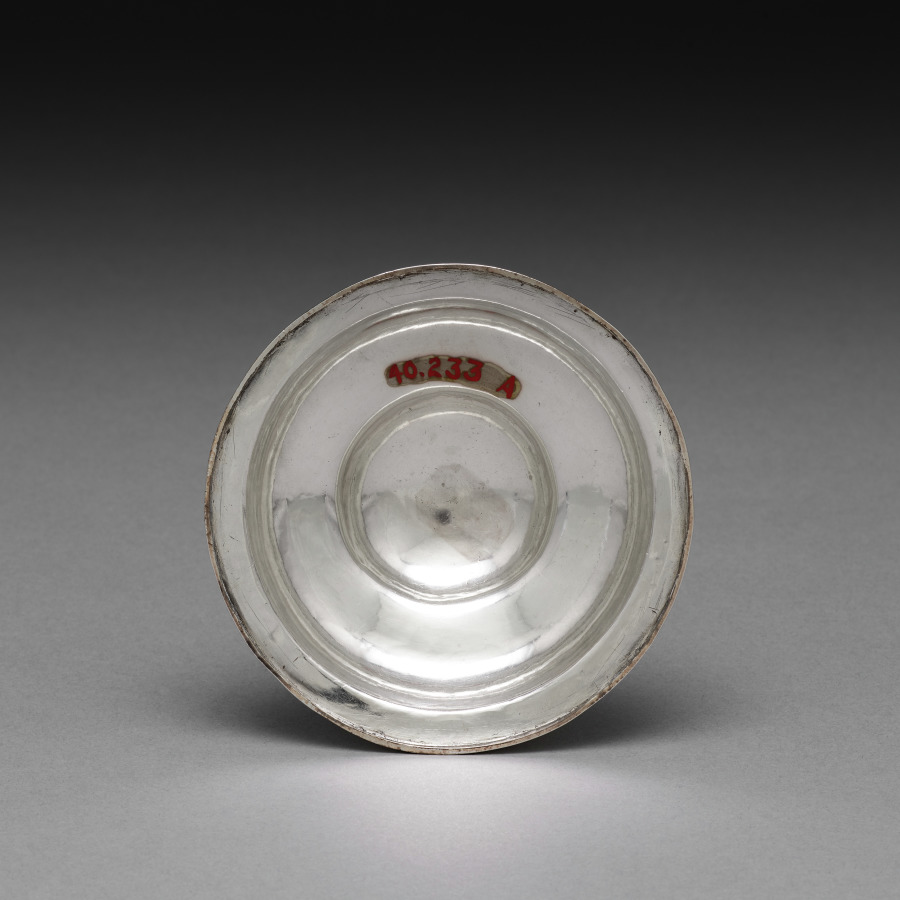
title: Cover for a Sugar Bowl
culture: America, Massachusetts, 18th century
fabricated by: Thomas Lynde (American, 1748–1811)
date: c. 1770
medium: silver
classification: Silver